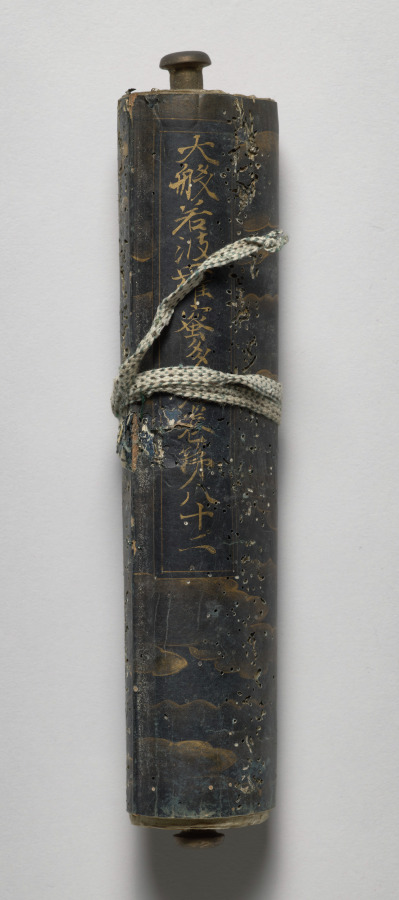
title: Volume from the Great Perfection of Wisdom Sutra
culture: Japan, Heian period (794–1185)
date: late 1100s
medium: Handscroll; ink and gold on dyed paper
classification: Manuscript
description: This scroll is part of the 600-volume Great Perfection of Wisdom Sutra. The sacred text addresses the perfection of wisdom and the nonsubstantiality of all phenomena, or the emptiness of all things. It takes the form of Shakyamuni Buddha’s preaching at four locations. This scroll is from the Perfection of Wisdom in 100,000 Lines, which occupies the first 400 volumes. At one time, religious clergy kept all the scrolls in a lacquered wood repository. They are now too fragile to open and we will conserve them over time.